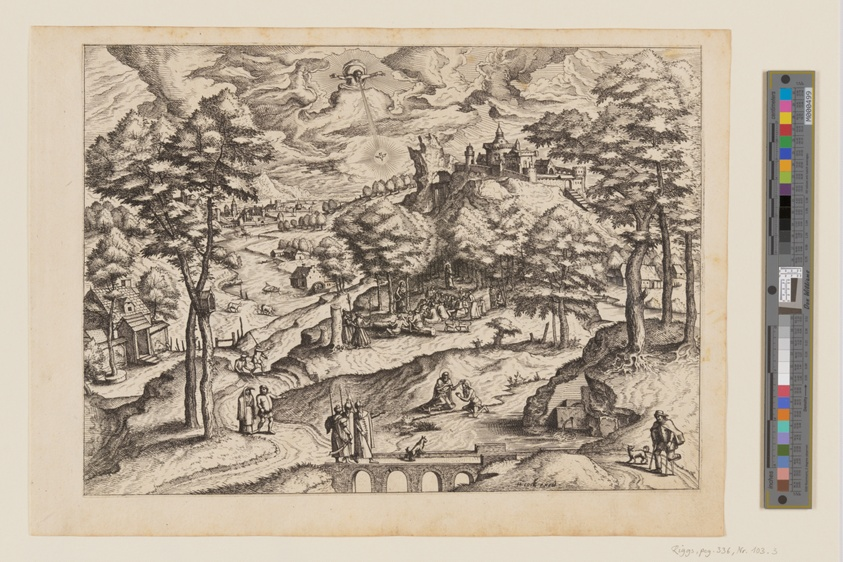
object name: Print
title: The Baptism of Christ, from Landscapes with Biblical Subjects and Saints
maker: Johannes van Doetecum (Netherlandish, 1528/32–1605) and Lucas van Doetecum (Dutch, died before 1584); after Lucas Gassel (Netherlandish, c. 1485-c. 1568)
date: c. 1562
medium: Etching on ivory laid paper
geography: Netherlands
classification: etching; paper; print; prints and drawing